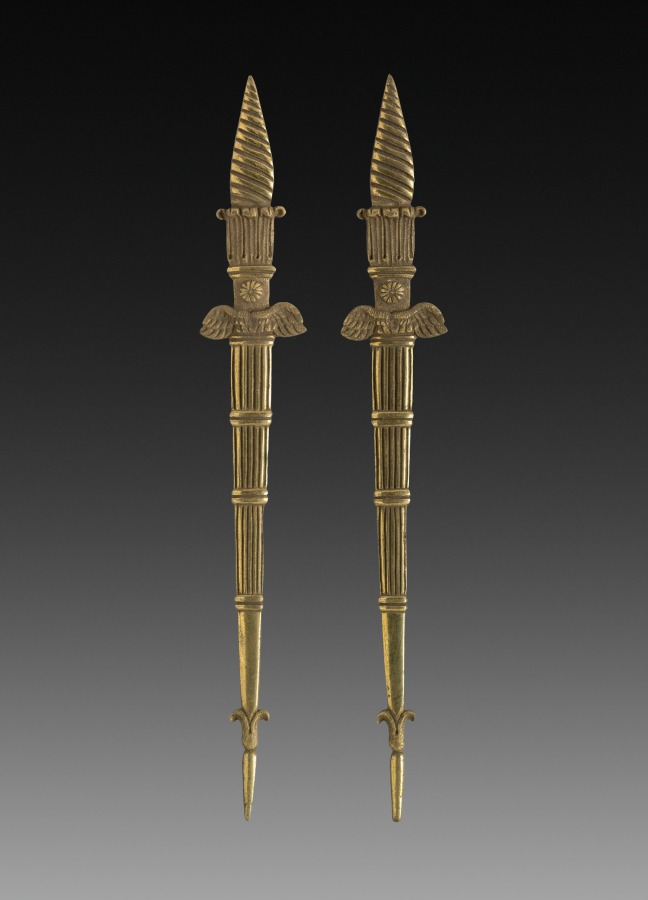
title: Ornamental Detail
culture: France, 18th century, Period of Louis XVI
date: 1775–1799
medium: gilt bronze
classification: Metalwork